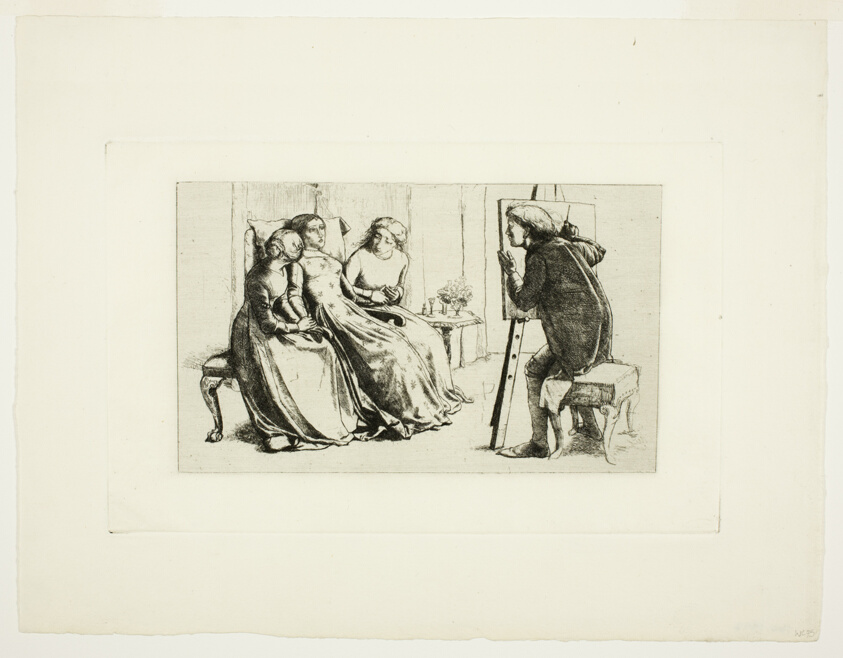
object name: Print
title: Saint Agnes of Intercession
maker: Sir John Everett Millais (English, 1829-1896)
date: 1850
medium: Etching on cream laid paper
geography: England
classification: etching; print; prints and drawing